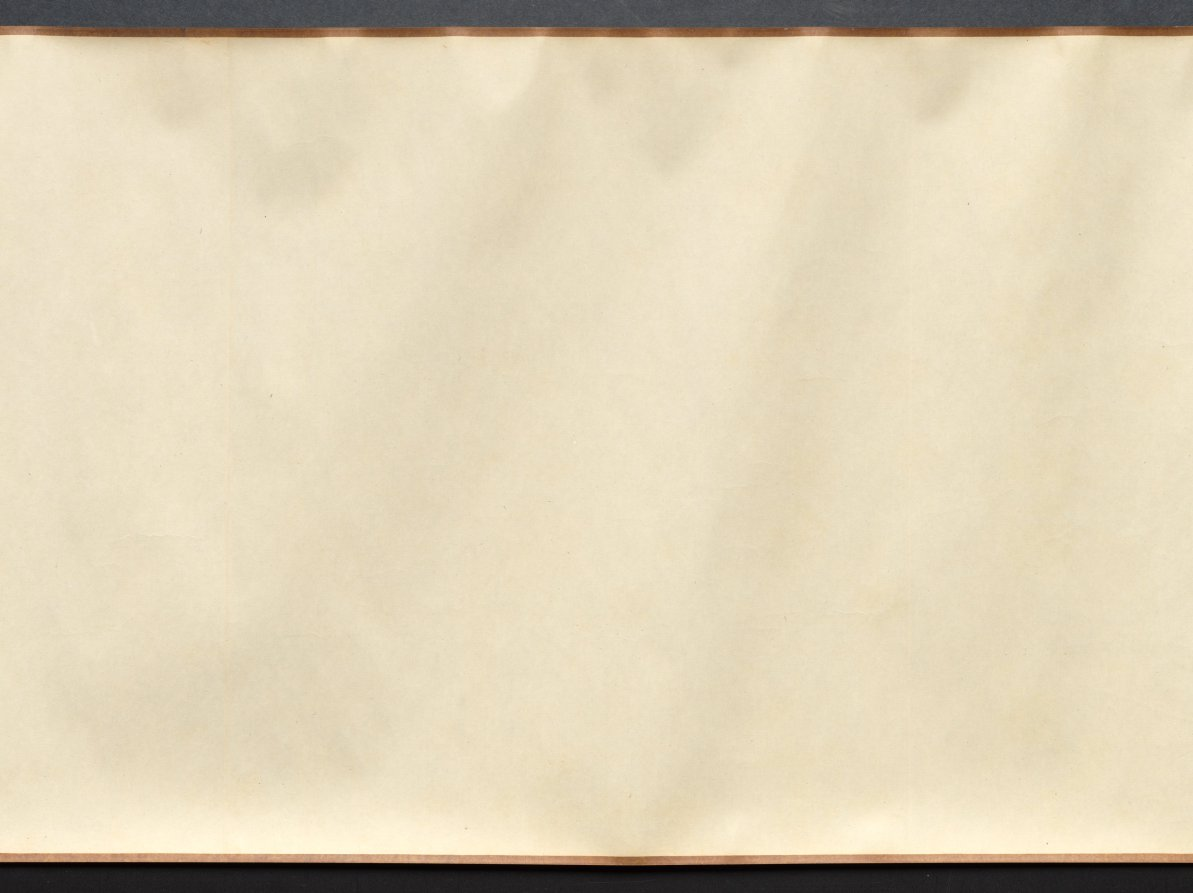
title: Returning to the Village in a Rainstorm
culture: China, Ming dynasty (1368–1644)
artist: Xie Shichen (Chinese, 1487–after 1567)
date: 1530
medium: Handscroll; ink and light color on silk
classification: Painting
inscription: 風雨歸村圖 嘉靖庚寅秋日樗仙謝時臣. [印] 謝時臣印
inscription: 3 additional seals unidentified.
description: This scroll depicts a wind- and rainswept landscape with figures in the countryside struggling against a late summer monsoon rainstorm. Such weather was familiar to residents of the lower Yangzi delta. Xie Shichen spent most of his life in the Suzhou area. Details of his career are scant, but his surviving works suggest that he made his living as a professional painter. This painting conveys drama and anecdotal observations, characteristic of Zhe school paintings, such as the one by Lü Wenying, CMA 1970.76.